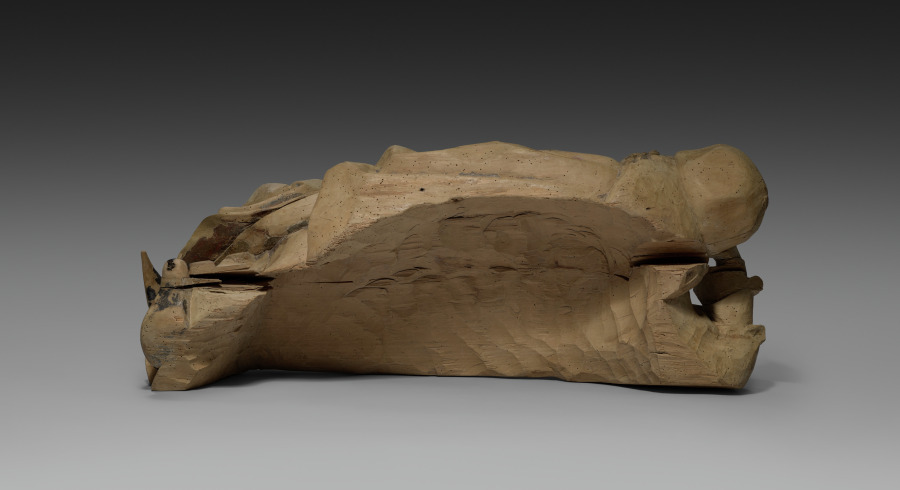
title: Jesse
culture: Germany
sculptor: Veit Stoss (German, c. 1445–1533)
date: c. 1500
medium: Limewood, polychromed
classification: Sculpture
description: The figure shows the sleeping Jesse, the father of David from the Old Testament. As the ancestor of the family tree of Christ, he was depicted in the Middle Ages sleeping as the starting point of the tree, on whose branches the ancestors of Christ are depicted. Mary with the Christ child is always shown at the top. The figure comes from a wooden altarpiece from an unknown church, possibly in Nuremberg, which is now lost. Veit Stoss is one of the most prominent German sculptors around 1500 who was mainly active in Nuremberg (Bavaria, Germany) and Krakow (Poland), also as a painter and engraver.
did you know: The family tree of Christ starts from Jesse, the father of David in the Old Testament.